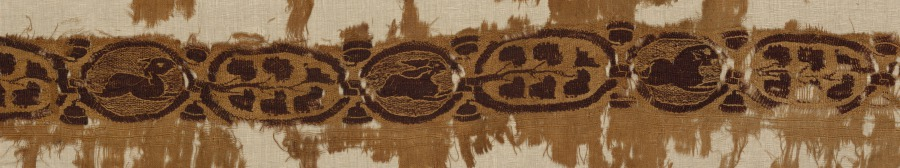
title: Fragment of a Tunic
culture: Egypt, Byzantine period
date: 400s - 500s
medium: tabby weave with interwoven tapestry ornament, linen and wool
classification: Textile